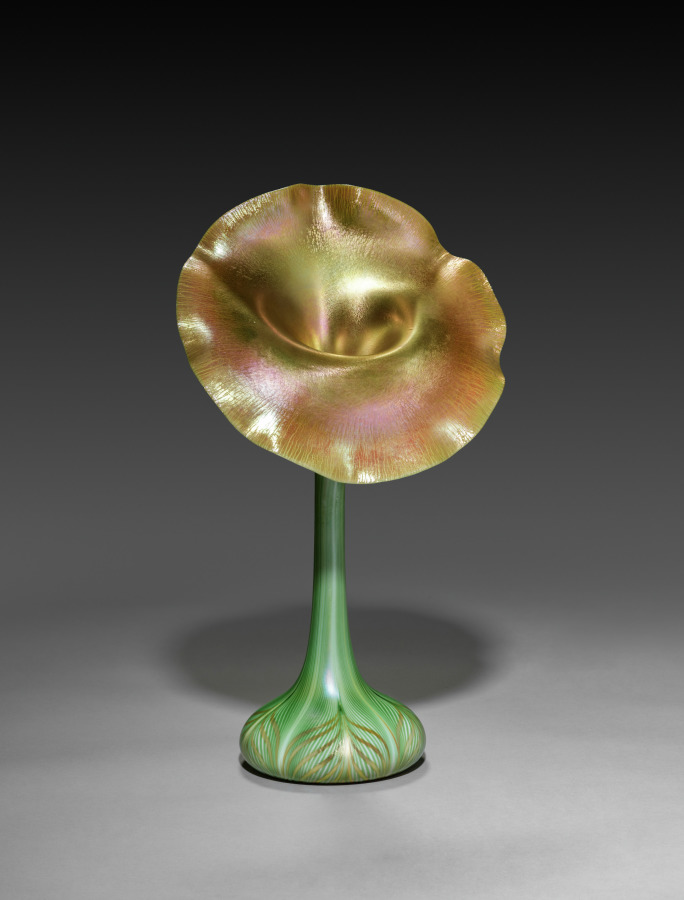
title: Jack-in-the-Pulpit Vase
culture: America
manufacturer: Quezal Art Glass and Decorating Company (American, 1901–1924)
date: c. 1900–1920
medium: blown glass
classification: Glass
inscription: engraved on underside: Quezal/-O-/440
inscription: affixed to underside: remnant of an original paper label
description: The Quezal Art Glass and Decorating Company was begun by former employees of Louis Comfort Tiffany as a rival operation in 1902. With its expressive form and brilliant golden iridescence, this vase represents the finest work produced by the Queens, New York, company in the Art Nouveau style.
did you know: The Quezal Art Glass and Decorating Company was named after a rare breed of South American bird, the quetzal, known for its colorful iridescent plumage.